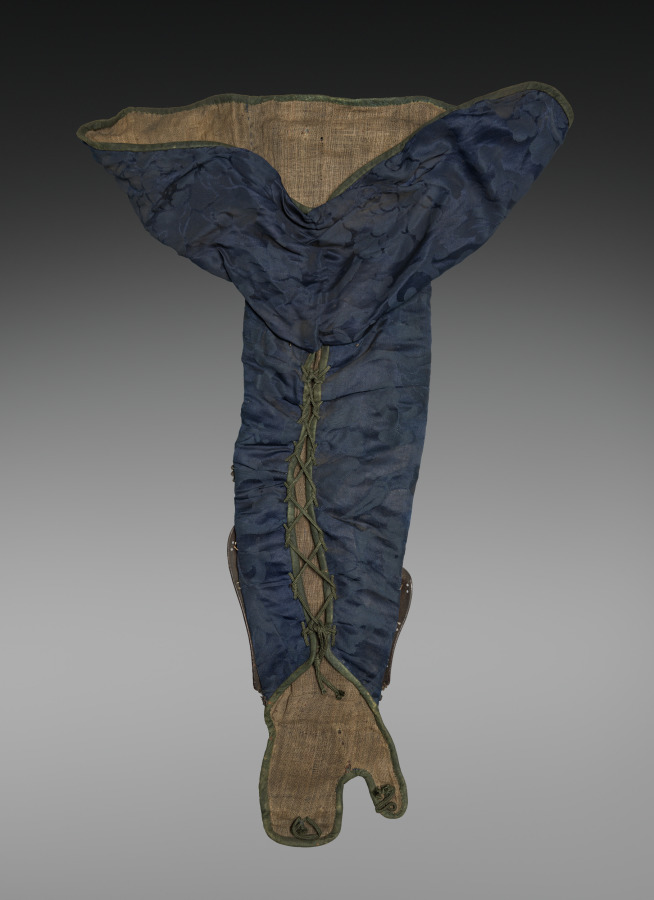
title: Armored Sleeve (Kote)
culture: Japan, Edo period (1615–1868)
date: 1600s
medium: Iron, lacquer, textile (silk)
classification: Arms and Armor